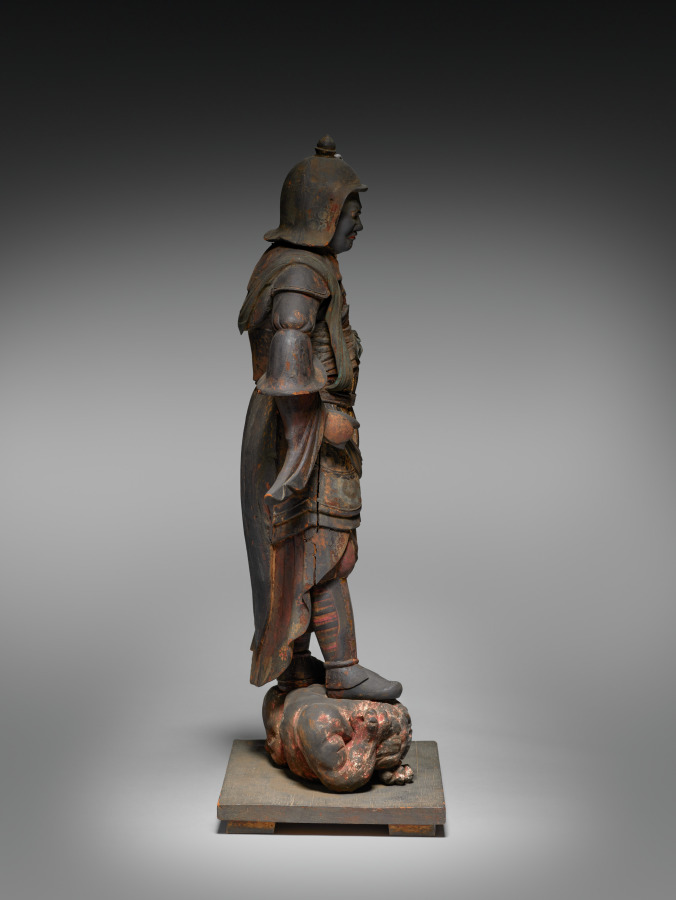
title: Guardian Figure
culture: Japan, Heian period (794–1185)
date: 1000s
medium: wood with polychromy and kirikane (cut-gold)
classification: Sculpture